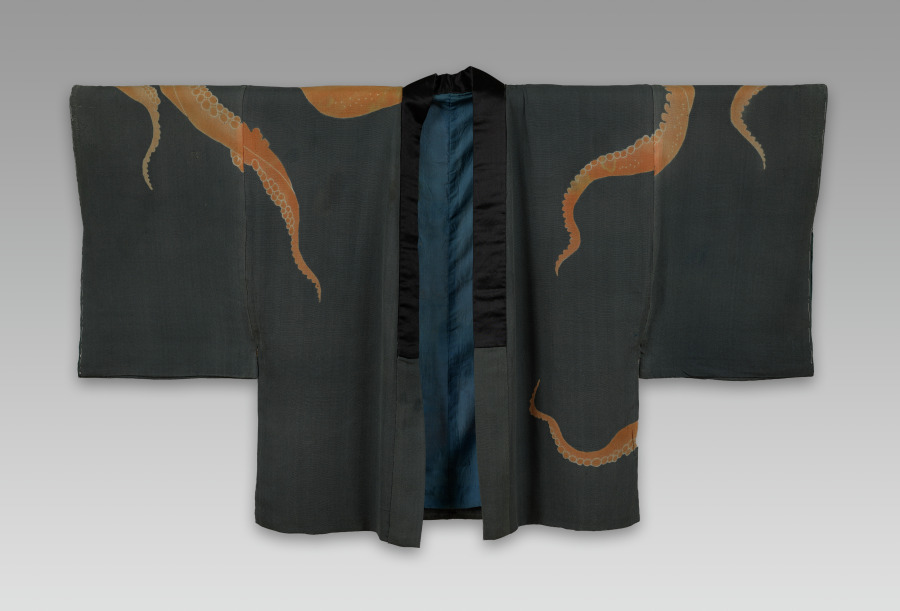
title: Jacket with Octopus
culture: Japan, Edo period (1615–1868)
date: c. 1800–1868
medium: Silk crepe (chirimen)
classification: Textile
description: With its many long arms, the octopus lends itself to a tantalizing design, with the front of this garment displaying tentacles and the back revealing the face. An octopus motif sometimes appears on costumes for the role of the Catfish Priest, a sidekick of the main villain in the Kabuki play Shibaraku (Stop a Moment!). It is also seen in genre painting during the 1600s as a logo on the uniforms of transportation staff, perhaps indicating just how much they can carry. This jacket may have recycled the idea as a fashion statement.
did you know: Crepe results from the weft thread being kept tighter than the warp thread during weaving.